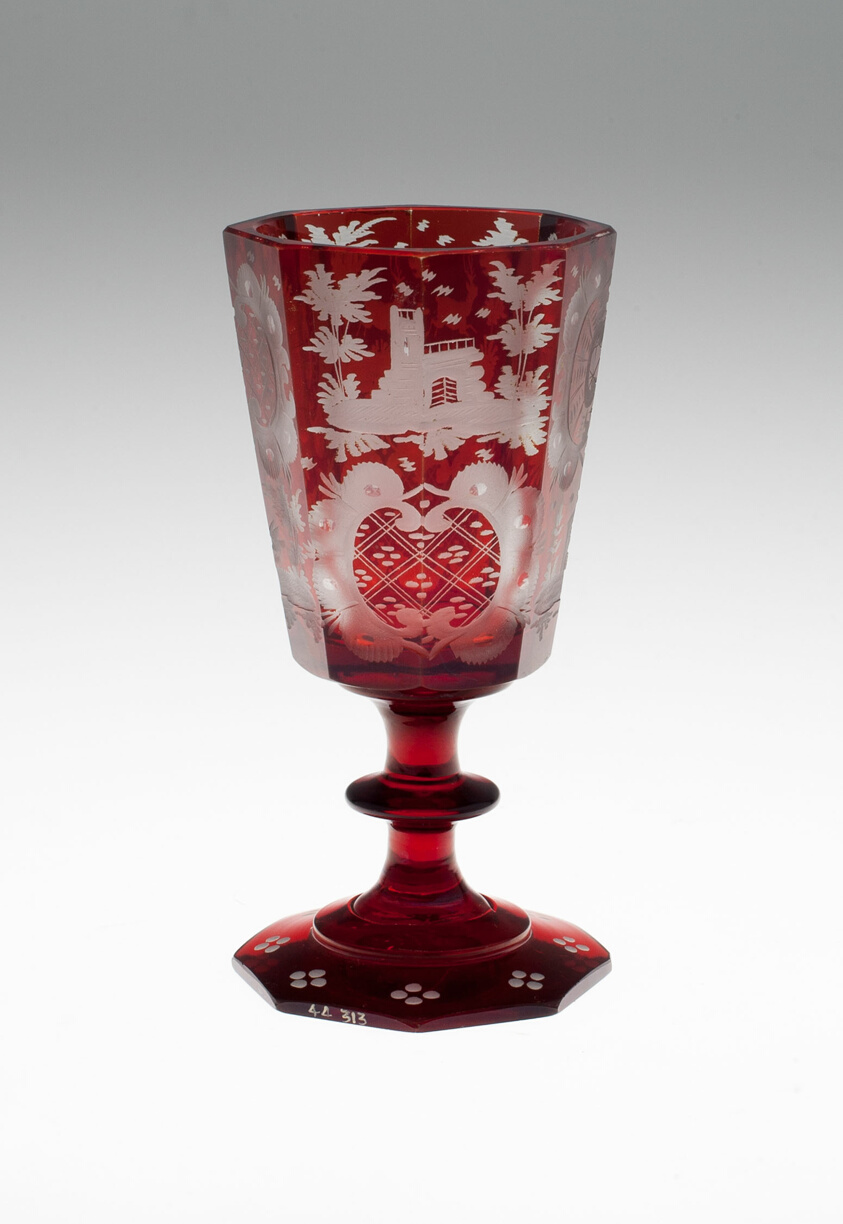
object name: Glass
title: Wine Glass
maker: Bohemia, Czech Republic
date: c. 1850/80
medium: Glass; blown, cut, stained red and engraved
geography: Bohemia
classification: drinking vessel; glass; european decorative arts